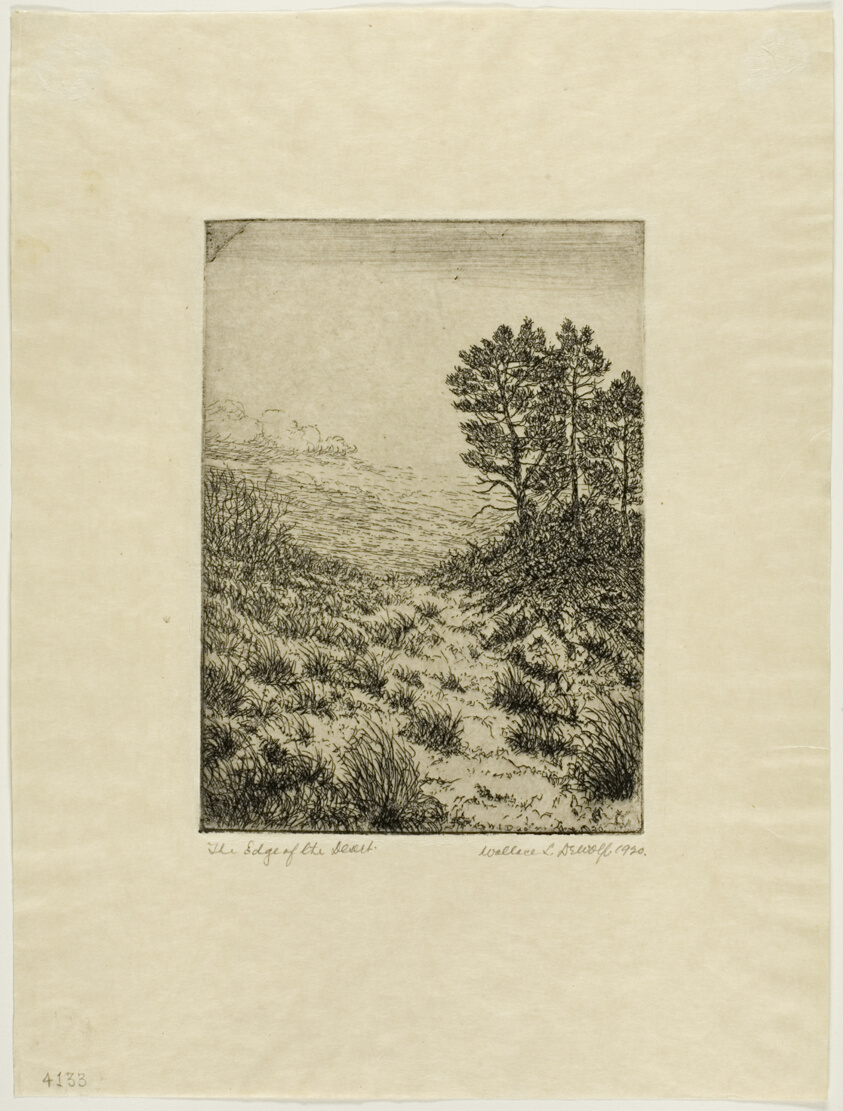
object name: Print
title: The Edge of the Desert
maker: Wallace L. DeWolf (American, 1854-1930)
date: 1920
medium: Etching on cream wove paper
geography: United States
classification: etching; print; prints and drawing